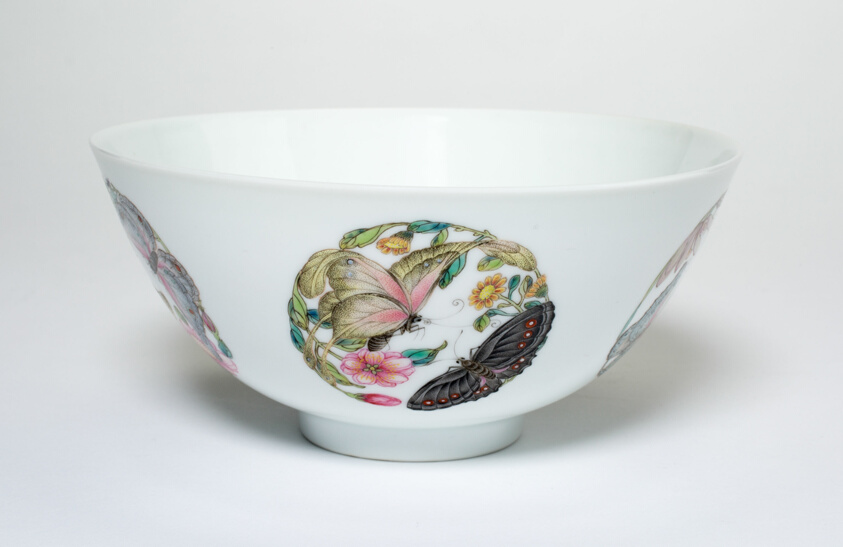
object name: Vessel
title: Bowl with Medallions of Butterflies, Peonies, Chrysanthemums, Peaches, Plums and Orchids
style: Chinese (culture or style)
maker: China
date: Qing dynasty (1644–1911), spurious reign mark of Yongzheng (1723–35) , overglaze painting perhaps added later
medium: Porcelain painted in overglaze famille rose enamels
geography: China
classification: bowl; porcelain; dish (vessel); asian art; ceramics; vessel